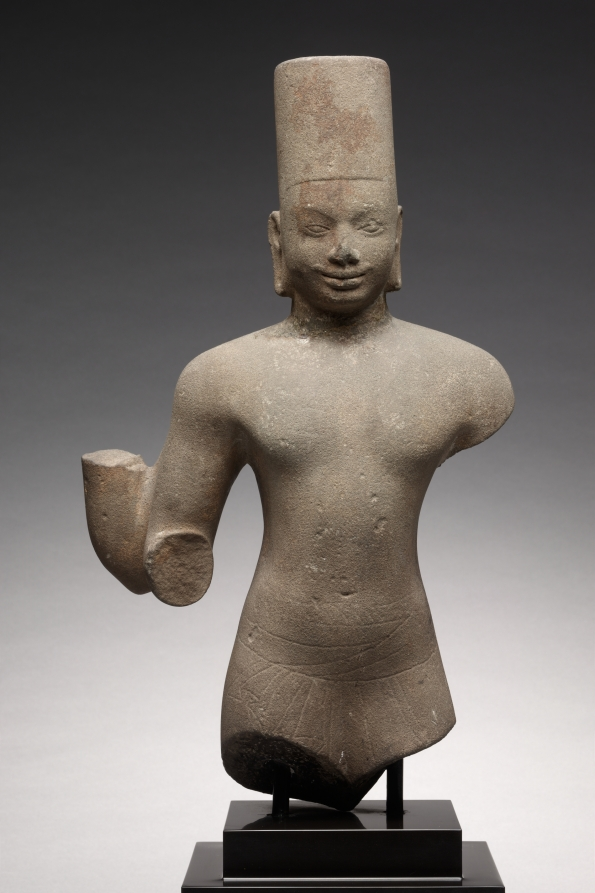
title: Vishnu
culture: Cambodia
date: 650–700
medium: sandstone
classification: Sculpture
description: Vishnu has the features of royalty, indicated by the high mitre-like crown with the flat top, distinctive to types made at the site of Prasat Andet. His status as a god, greater than any earthly king, is indicated by the four arms, traces of which are still visible. The sensitive rendering of the eyes and slight smile are characteristics of Cambodian sculpture, and during this early period, the form of the body reveals some relatively naturalistic musculature and treatment of the garments. He wears the Southeast Asian lower garment called sampot, around which his upper garment is loosely tied. It is Vishnu who incarnates himself into the world in avatars, including Krishna and the boar Varaha. Here we see his iconic form as Vishnu himself.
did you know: The deity is four-armed with the arms running parallel from the shoulders and then bifurcating at the elbows.